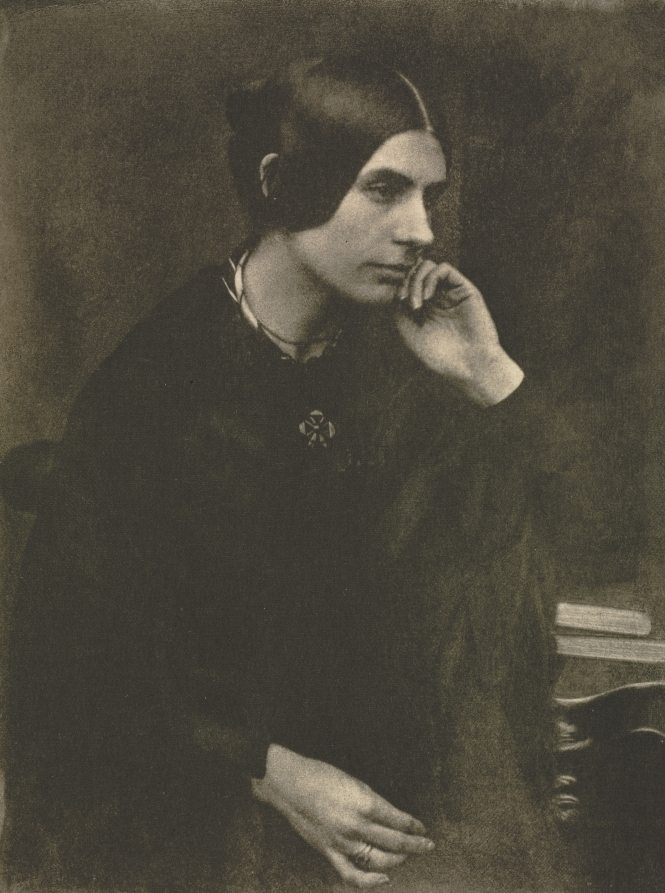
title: Camera Work: Lady in Black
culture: England, 20th century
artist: David Octavius Hill (British, 1802–1870)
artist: and Robert Adamson (British, 1821–1848)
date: 1912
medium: photogravure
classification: Bound Volume